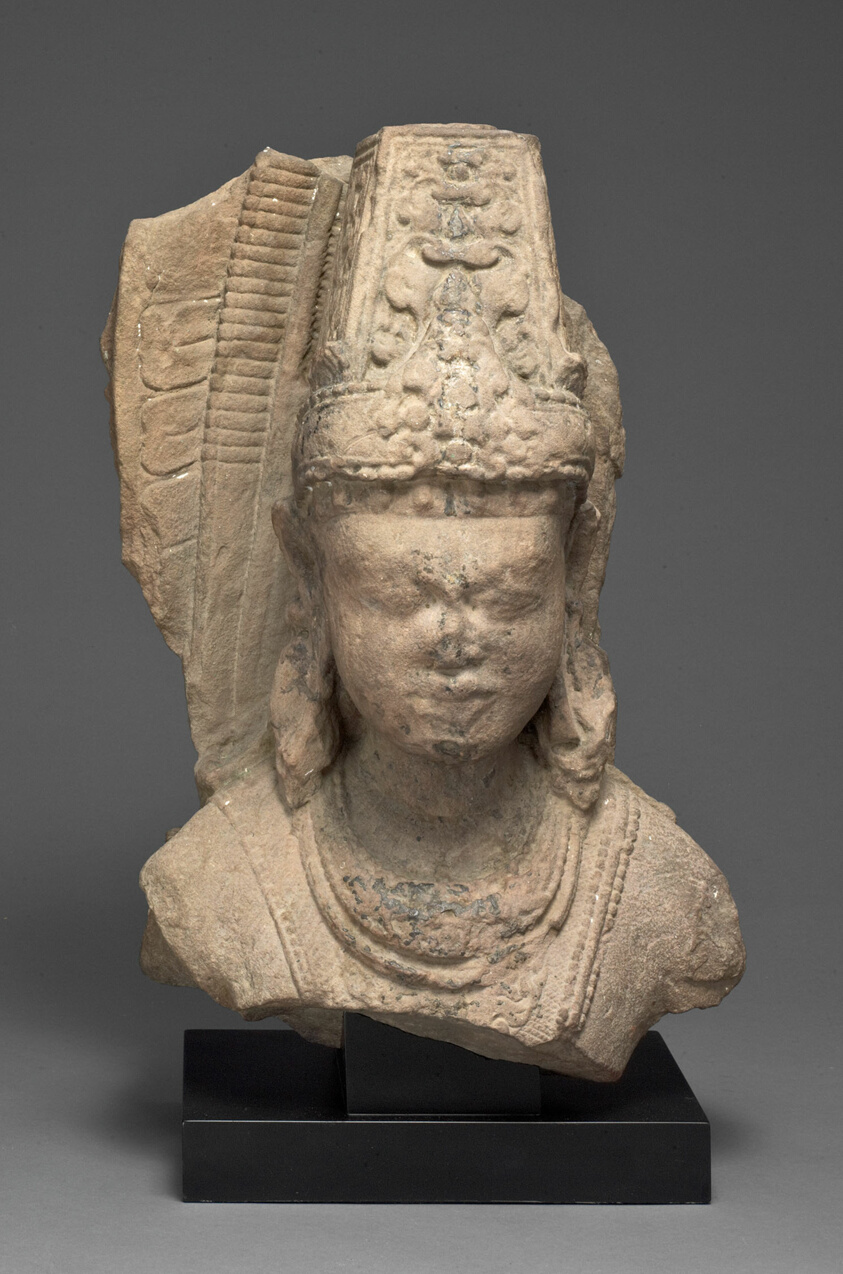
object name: Sculpture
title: Bust of Crowned God Vishnu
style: South Asian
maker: India; Uttar Pradesh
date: 9th century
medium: Sandstone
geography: Uttar Pradesh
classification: sandstone; stone; sculpture; asian art